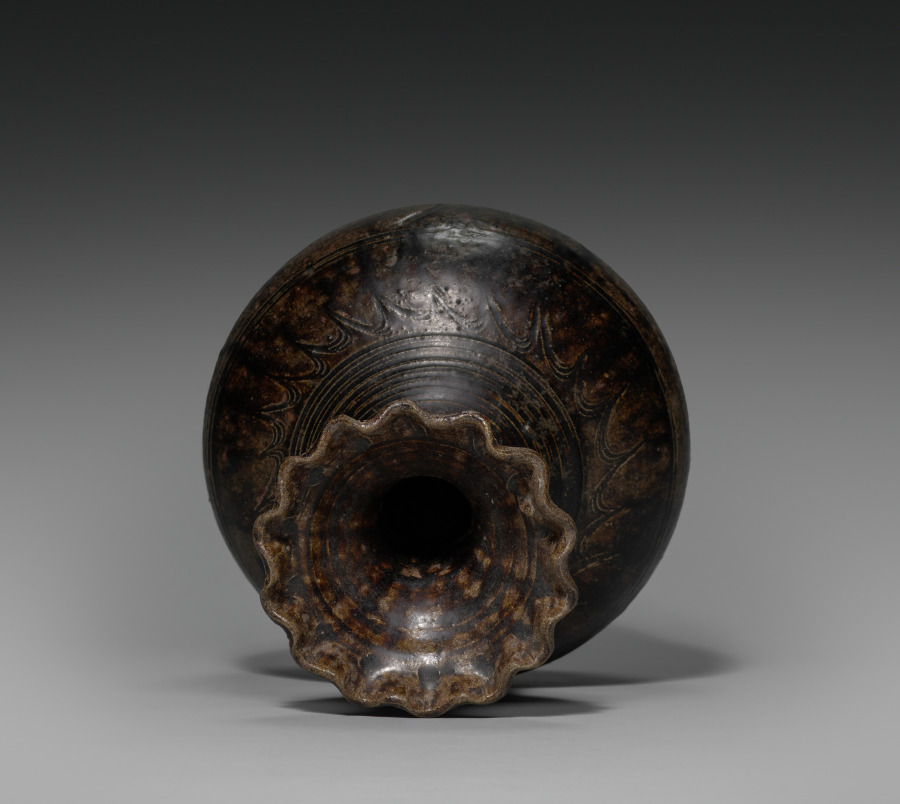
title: Khmer Vase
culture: Cambodia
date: 1100s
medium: earthenware with dark brown glaze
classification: Ceramic